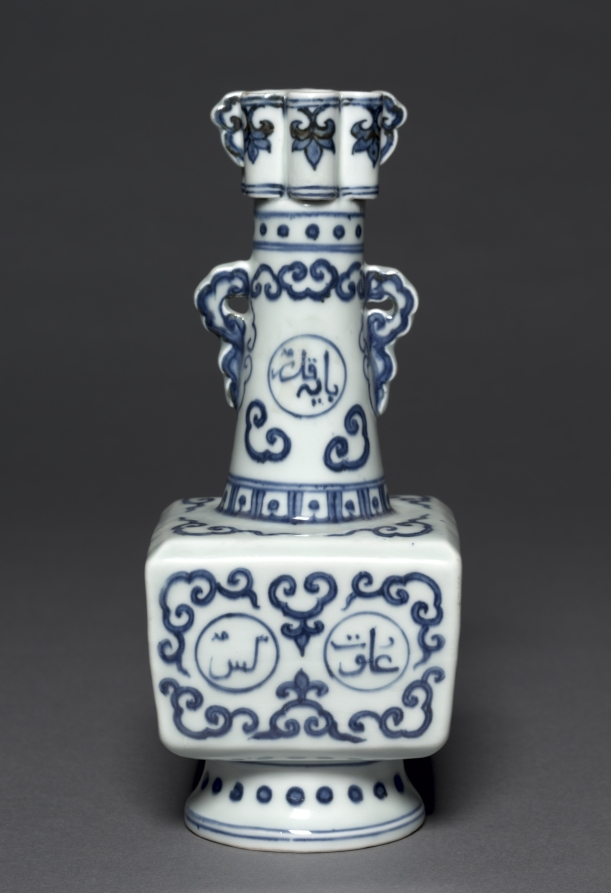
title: Arrow Vase with Persian Inscriptions and Floral Scrolls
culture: China, Jiangxi province, Jingdezhen kilns, Ming dynasty (1368-1644), Zhengde mark and reign (1505-1521)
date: 1506–21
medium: porcelain with underglaze cobalt blue decoration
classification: Ceramic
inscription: The two Persian inscriptions on the neck freely translated read 'Oh Beautiful! Oh Powerful'! Those around the body read 'None knows the extent and limits of Thy power and Majesty.'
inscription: 大明正德年製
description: Chinese potters in the 1500s integrated foreign motifs, shapes, and ideas in order to cater to changing tastes and new customers in an increasingly global world.